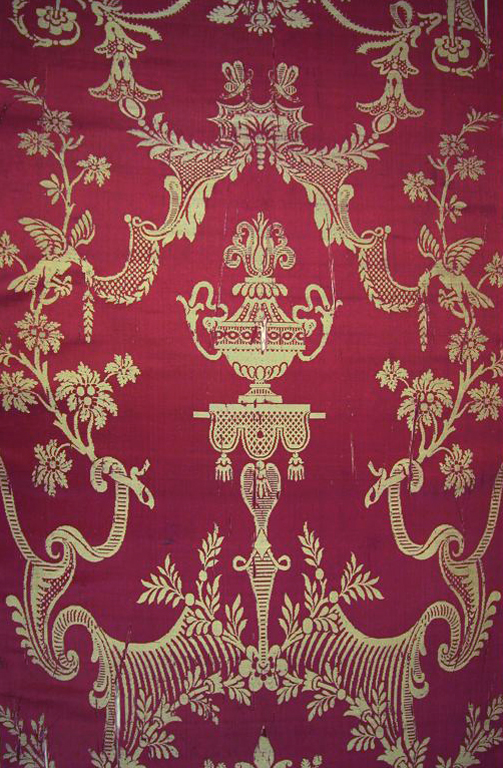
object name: Textile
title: Panel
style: egyptian revival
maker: France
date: 1775/1800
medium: Silk, warp-float faced 7:1 satin weave self-patterned by areas of 1:7 'Z' twill weave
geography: France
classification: textile; weaving